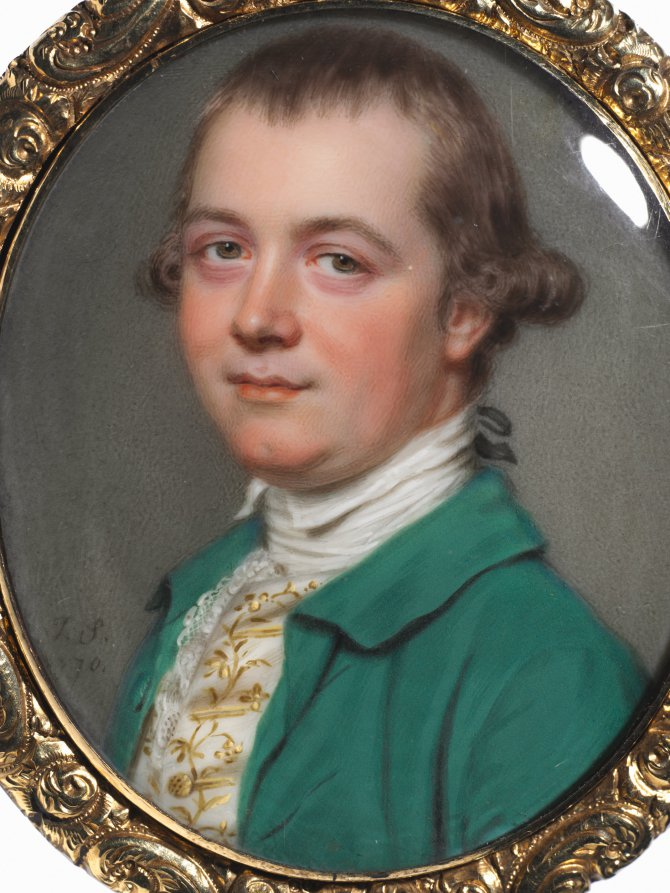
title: Portrait of Constantine Phipps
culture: England, 18th century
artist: John I Smart (British, 1741–1811)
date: 1770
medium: watercolor on ivory in a later gold and woven hair bracelet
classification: Portrait Miniature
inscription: signed lower left: J.S. / 1770.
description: John Smart painted the British gentleman Constantine Phipps (1746–1797) at the age of twenty-four, executing this portrait in 1770, the year following the death of the sitter’s father, Constantine Phipps (1710?–1769), and preceding his marriage to Elizabeth Tierney (d. 1832). Phipps the younger was the second son of a landowner and lived throughout England and France. In 1788 he moved his family to Caen, Normandy, hoping to educate his ten (eventually thirteen) children more economically. Phipps and his wife returned to England in 1792 to attend their daughter’s wedding. The escalating conflict between France and England prevented Phipps from returning to France where he had left eight children behind. Unfortunately, he did not see them before his death five years later. The portrait represents Phipps’s nearly full face. He has light brown eyes and natural brown hair worn en queue. He wears a green coat with a small collar, a white waistcoat embroidered with gold, and a high, white stock collar. Phipps is depicted against an olive-gray background. This early work by Smart already exhibits hallmarks of the artist’s style, such as the plain, gray background, the sitter’s colorful clothing, and his expressive eyes and slightly upturned mouth, which suggest that Phipps was a self-assured man with a sense of humor. The small format is also characteristic of the first decade of Smart’s career. This miniature is mounted in an elaborately carved gold frame on a bracelet made of gold and woven light brown human hair. The bracelet was executed later than the miniature and is in the style of the 1830s or 1840s. The inscription on the clasp reads “E. C. E. T. / Nov.r 29th 1838, aged 7” and may indicate that this bracelet was given to Constantine’s great-granddaughter Elizabeth Clarissa Emilie Toker (1831–1888) on her seventh birthday possibly by her mother or grandmother. There is a variant of this work in the Phipps collection in London. Painted in 1771, this miniature descended from Colonel Pownoll Phipps, the seventh child of Constantine Phipps, to John Constantine Phipps.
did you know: This miniature is mounted to a bracelet that was made at least 50 years later.